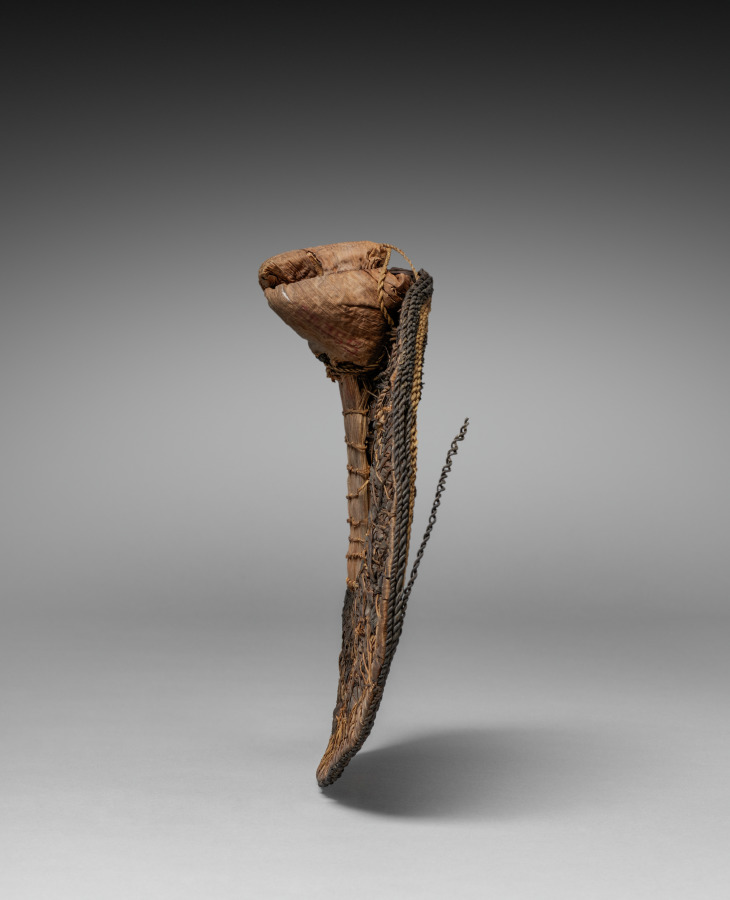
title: Back Skirt / Sitting Pad (negbe)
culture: Africa, Central Africa, Democratic Republic of the Congo, Mangbetu-style maker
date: before 1929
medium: Plant fibers and dye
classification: Garment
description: Egbe (singular: negbe) were fashionable and practical garments aristocratic Mangbetu women made for special occasions. Worn over a skirt, it tied onto a girdle along with a frontal “apron.” The curved interior piece rested on the lower back. Thickly woven, flexible natural fibers bent with the body, cushioning the wearer’s behind when sitting. When the woman was standing, the decorated flat portion faced outward, showing off bold geometric motifs. Egbe were among items sold to foreigners at the Mangbetu king’s encouragement as the Mangbetu actively constructed their self-image for outsiders during the 1920s and 1930s.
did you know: A contemporary fashion in 1929, when it was purchased or collected, this negbe is now a historical document of past styles.